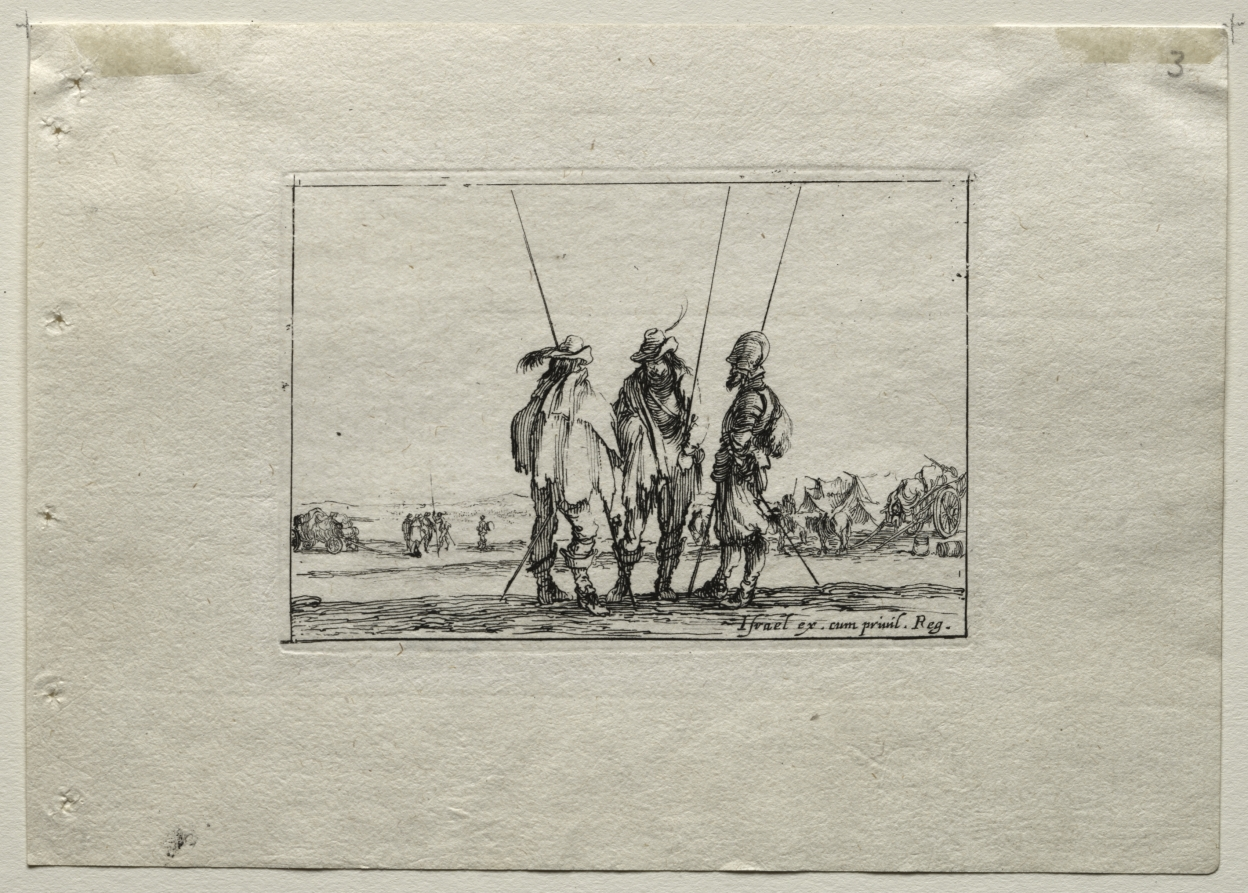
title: Caprices: Three Standing Soldiers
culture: Italy, 17th century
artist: Stefano Della Bella (Italian, 1610–1664)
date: c. 1642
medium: etching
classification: Print